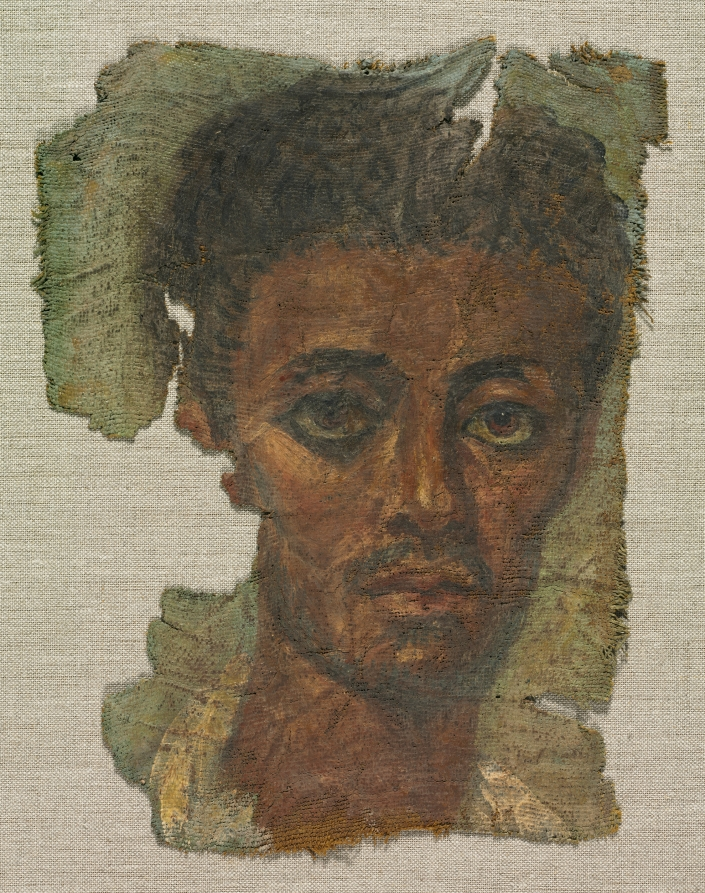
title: Funerary Panel of a Man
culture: Antonine-era Roman Empire (Egypt), unknown painter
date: about 138–92 CE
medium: encaustic on linen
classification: Painting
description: A young man with a slight mustache and warm brown eyes looks at the viewer from this painting. The linen on which his image was rendered was a less popular alternative to wood. Its delicate surface was only workable with brushes, and not the flat metal tools used for details on wooden paintings. The rest of the cartonnage (body case) the man’s image was once part of was painted with ancient Egyptian religious imagery, like that of the young man Artemidorus. The blended decorative forms on the cartonnage show how distinctive Greco-Roman and Egyptian representational systems interacted in Roman-ruled Egypt.